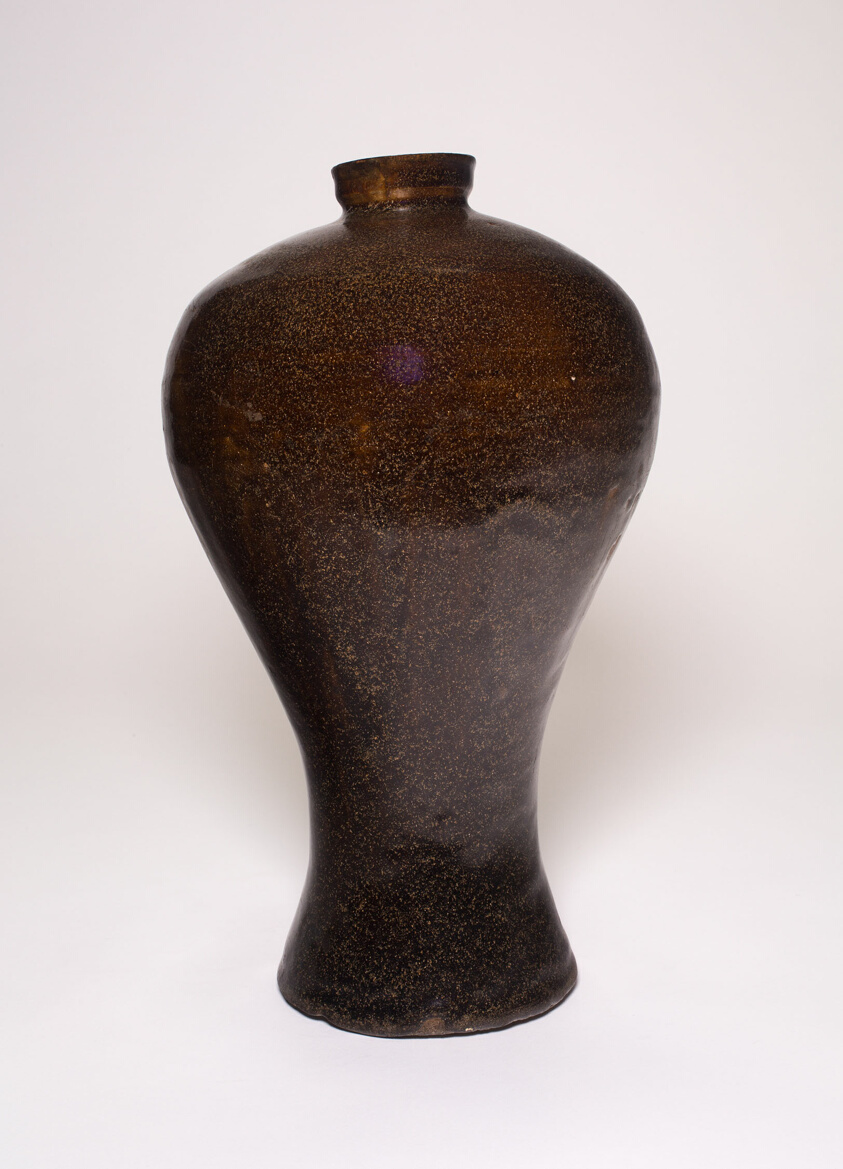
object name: Vessel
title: Bottle-Shaped Vase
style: Korean (culture or style)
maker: Korea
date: Goryeo dynasty (918–1392)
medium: Stoneware with iron brown glaze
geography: Korea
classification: vase; vessel; asian art; ceramics